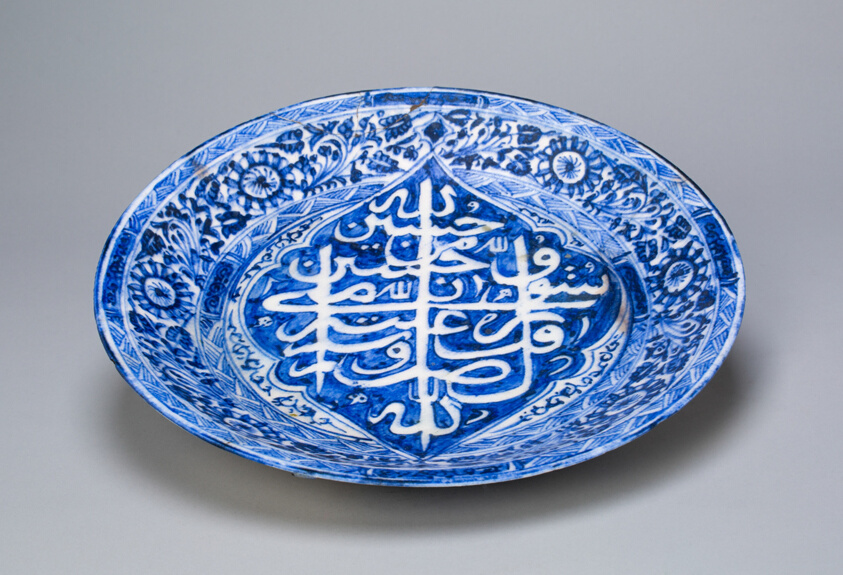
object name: Ceramics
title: Dish with a Prophetic Hadith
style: Islamic (culture or style)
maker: Ibn Haji 'Imad Ali; Iran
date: Qajar dynasty (1796–1925), dated 1238 AH/1822 CE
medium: Fritware, painted in blue under a transparent glaze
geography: Iran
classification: dish (vessel); asian art; ceramics; vessel